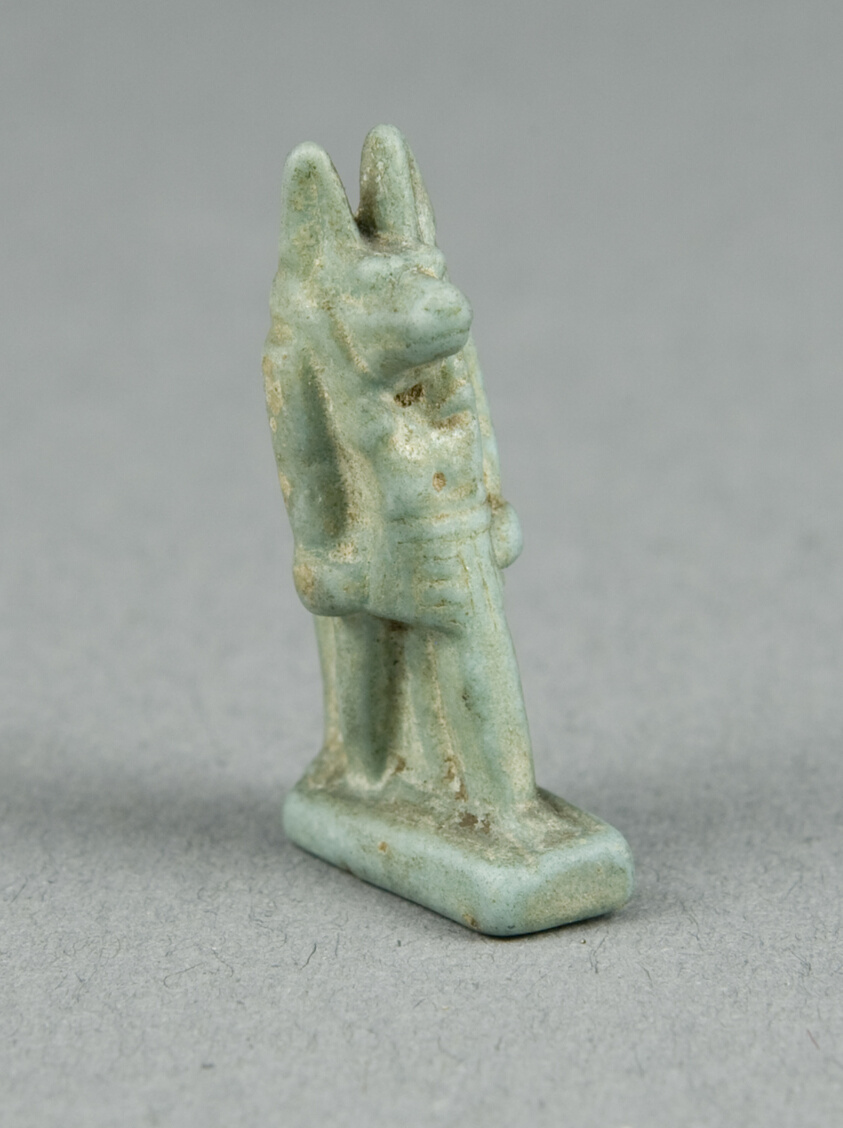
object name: Costume and Accessories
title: Amulet of the God Anubis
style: egyptian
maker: Egyptian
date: Late Period–Ptolemaic Period (664–30 BCE)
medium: Faience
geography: Egypt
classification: amulet; jewelry; ceramics; ancient art; costume; faïence (composite material)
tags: gods (deities)